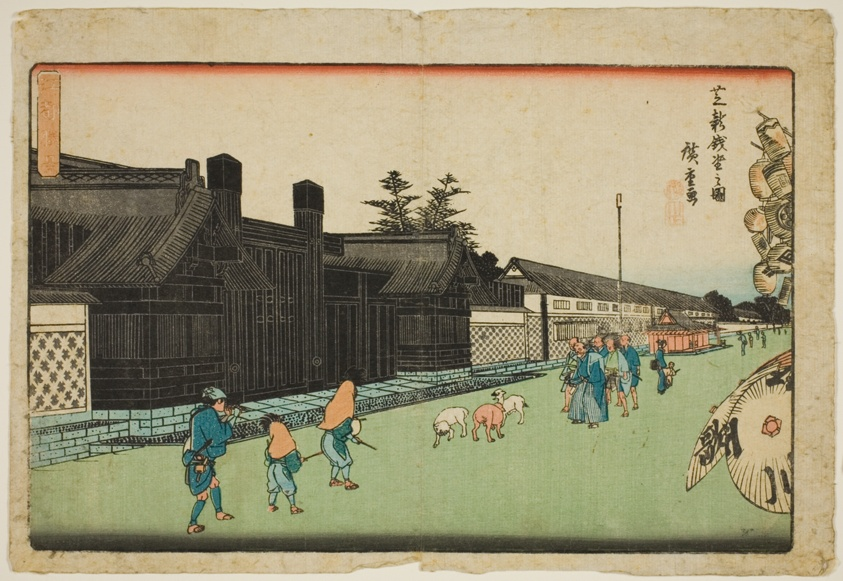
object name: Print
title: The New Mint in Shiba (Shiba shin zeniza no zu), from the series "Exceptional Views of Edo (Koto shokei)"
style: Japanese (culture or style)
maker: Utagawa Hiroshige 歌川 広重; Japanese, 1797-1858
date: c. 1835/39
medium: Color woodblock print; oban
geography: Japan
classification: print; asian art